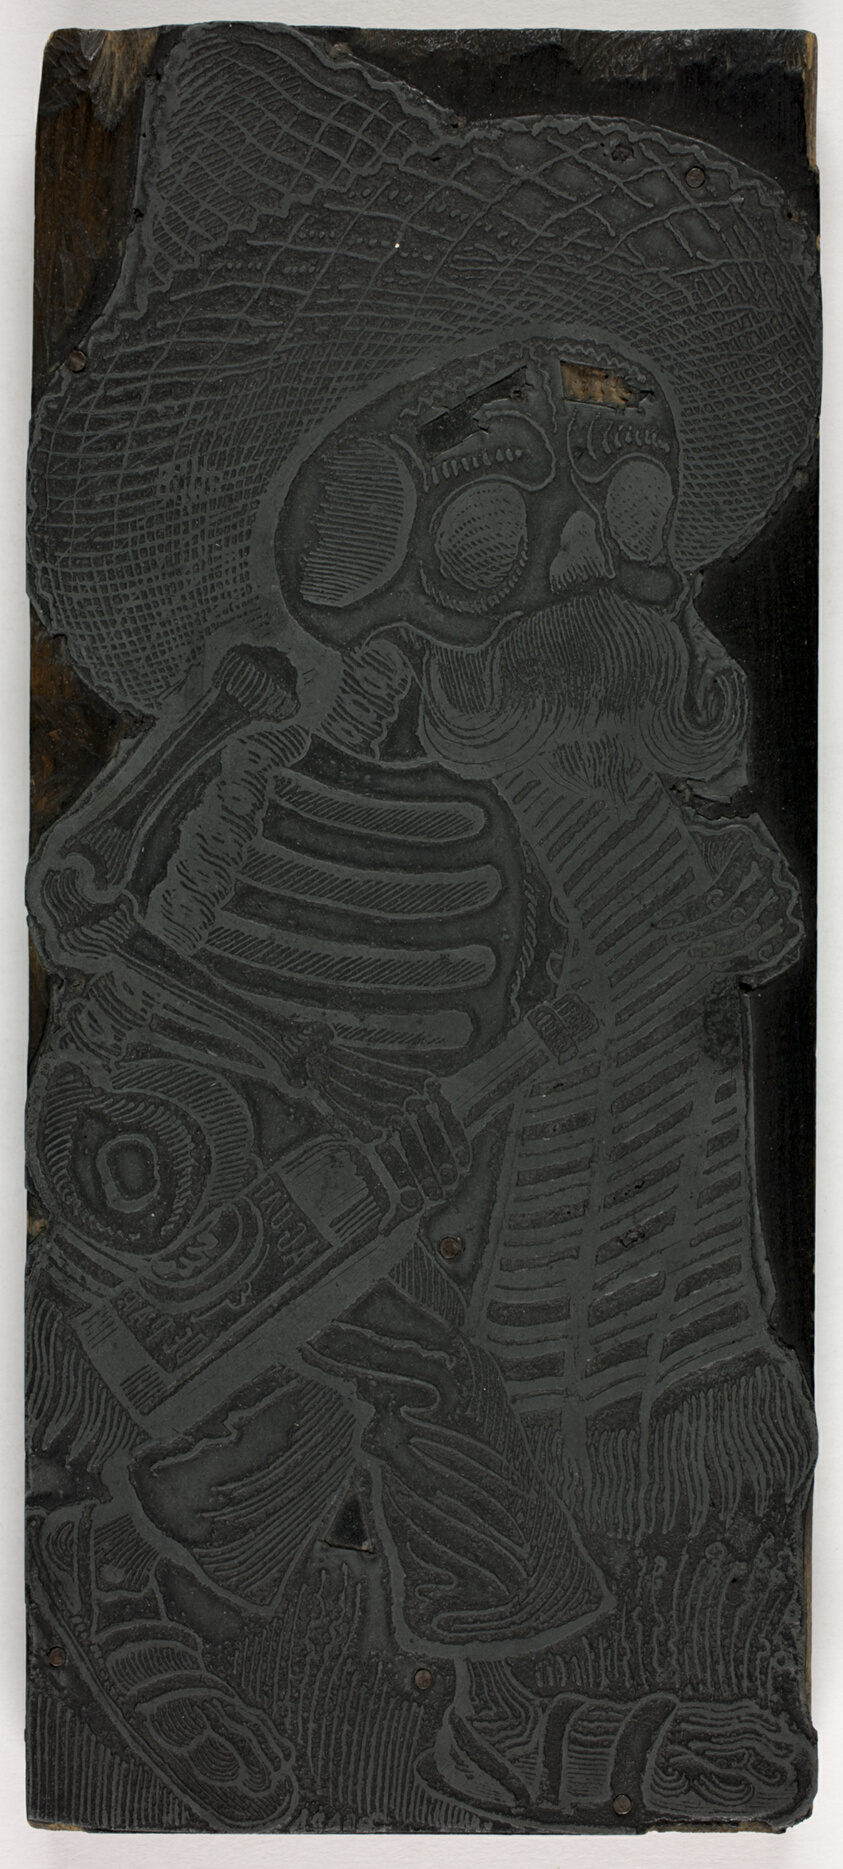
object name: Print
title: Printing block for Calavera of the Masses, no. 2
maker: José Guadalupe Posada (Mexican, 1852-1913)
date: 1910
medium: Zinc alloy plate etched with nitric acid and engraved with burin nailed to wood block (photo-relief etching)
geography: Mexico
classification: matrix; print; relief engraving; prints and drawing